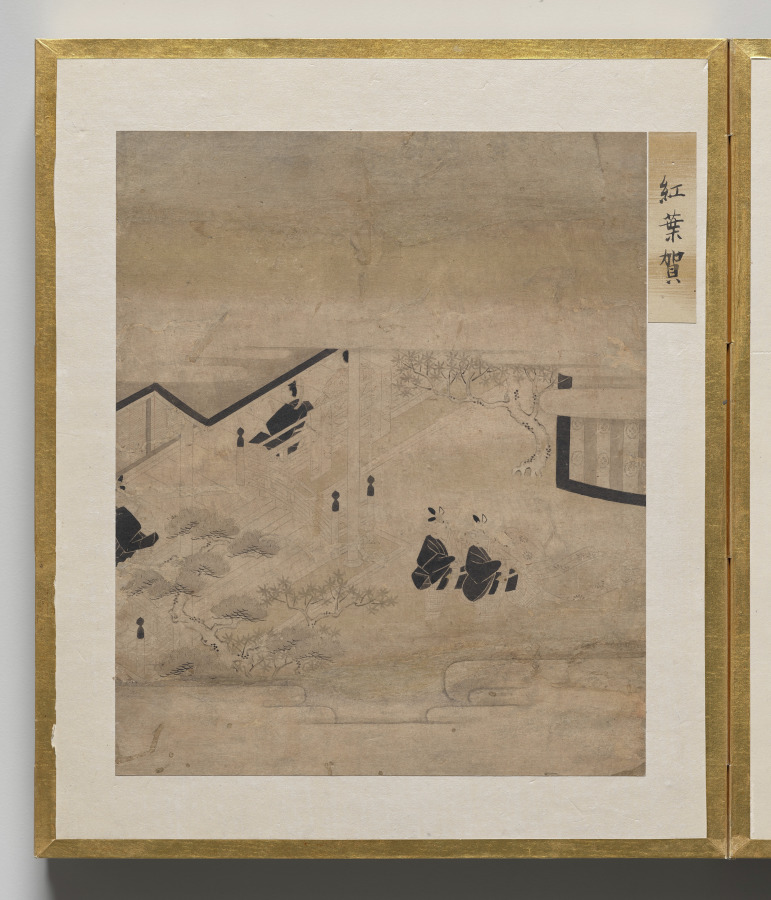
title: Autumn Excursion from Album of Illustrations for the Tale of Genji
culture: Japan, Edo period (1615–1868)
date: 1600s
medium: painting in an accordion-style album; ink, light color, and gold on paper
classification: Bound Volume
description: This album contains illustrations for the classic literary work the Tale of Genji, authored in the 1000s by Murasaki Shikibu, an aristocrat of the Heian period (794–1185) court. The scenes are painted in the “white drawing” (hakubyō) mode, in which a fine ink line is used to depict figures and spaces with great subtlety, punctuated only occasionally by traces of red pigment for a character’s lips, a detail of a garment, or a decorative element. These two scenes illustrate episodes from the chapters “Thin Veil of Cloud” (Usugumo) and “Barrier Gate” (Sekiya).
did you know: The illustrations are identified by chapter title in cartouches to the upper right of the paintings.